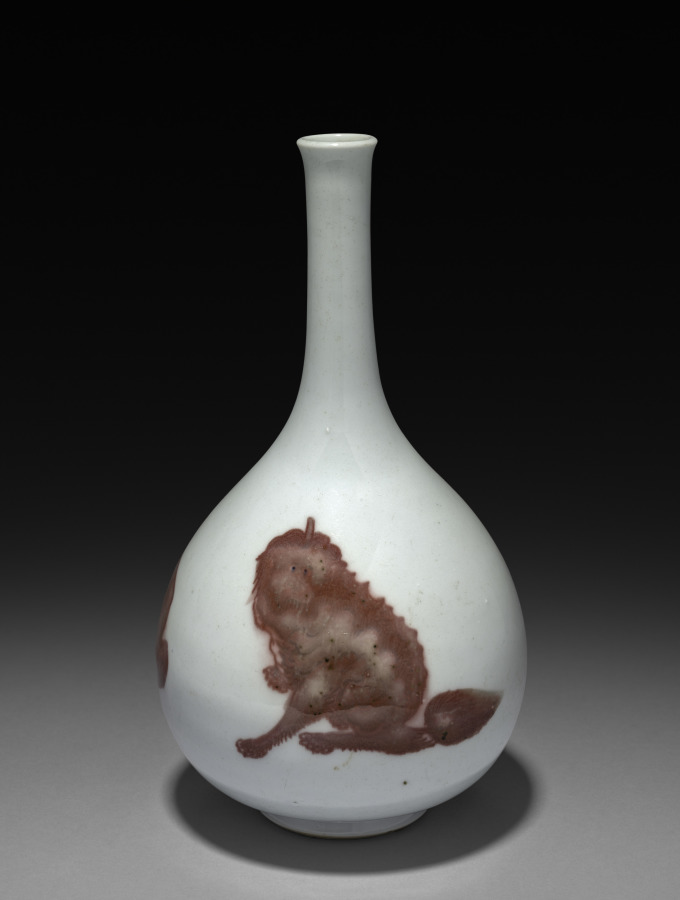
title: Bottle-shaped Vase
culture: China, Qing dynasty (1644-1911), Kangxi reign (1661-1722)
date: 1662–1722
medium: porcelain with underglaze decoration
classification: Ceramic